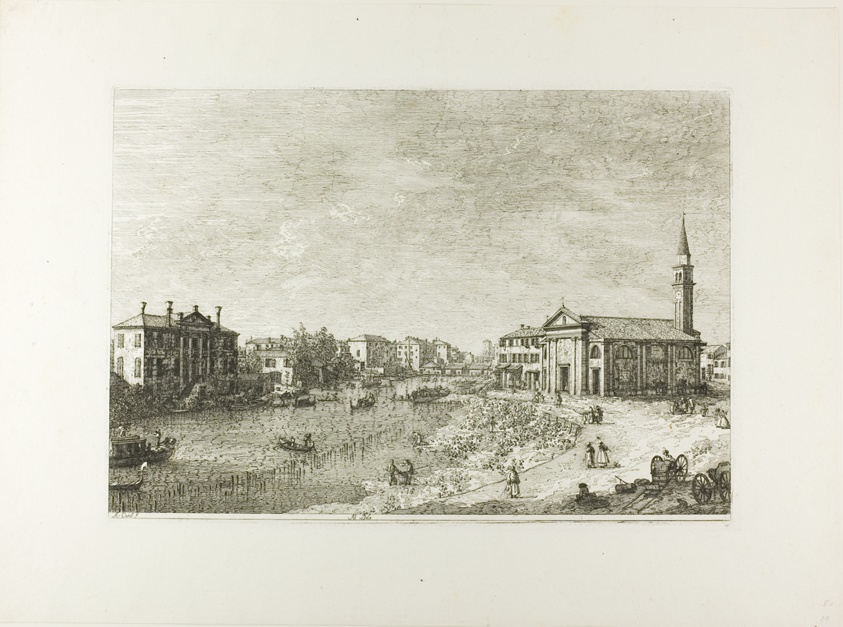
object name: Print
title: Al Dolo, from Vedute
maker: Canaletto (Italian, 1697-1768)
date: 1735/44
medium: Etching in black on ivory laid paper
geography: Italy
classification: etching; print; prints and drawing